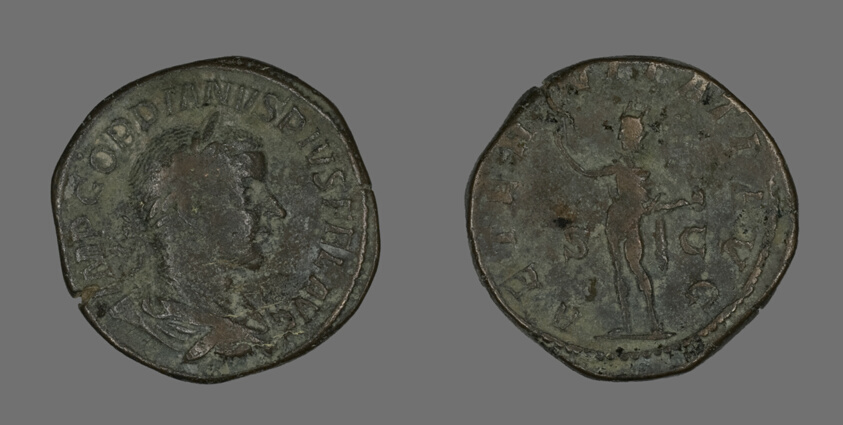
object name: Coin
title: Sestertius (Coin) Portraying Emperor Gordianus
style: roman (ancient, style or period)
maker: Roman, minted in Rome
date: 241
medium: Bronze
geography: Roman Empire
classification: coin; ancient art